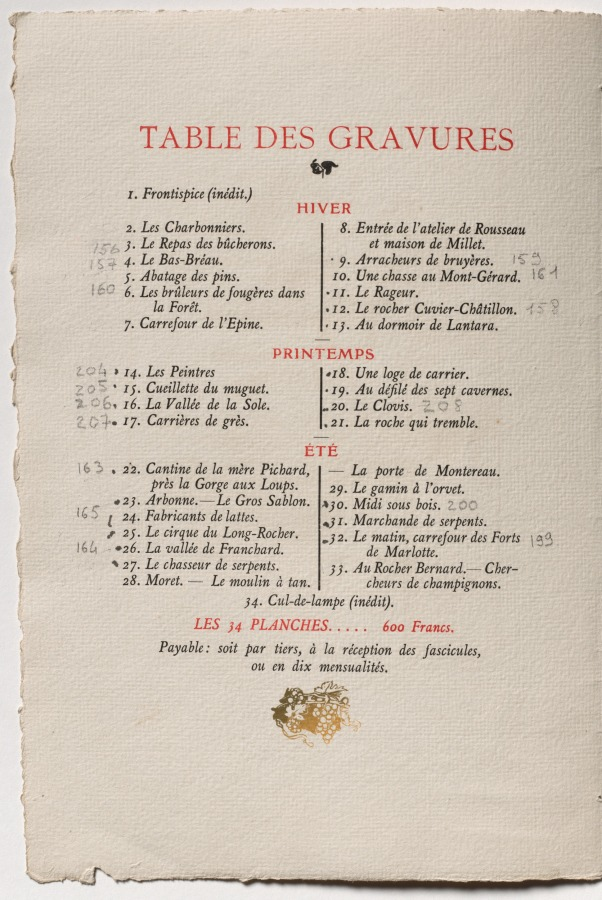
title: Fontainebleau Forest: Ad for "Fontainebleau Forest" (La Forêt de Fontainebleau)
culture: France, 19th century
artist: Auguste Louis Lepère (French, 1849–1918)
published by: A. Desmoulins, Published in Revue Illustrée, 1887–90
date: 1890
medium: pamphlet, color woodcut on cover, related to bound volume with 34 wood engravings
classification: Bound Volume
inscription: In block within image, in green ink, printing in letterpress: A. LEPÉRE; in plate, within image, in black ink: LA FORÊT DE FONTAINEBLEAU / Gravures originals de A. Lepère; in plate, within image, in red ink: Chez A. DESMOULINS, GRAVEUR / BOULEVARD JOURDAN - 60 -- / PARIS; below image, in green ink: P.D. SC.